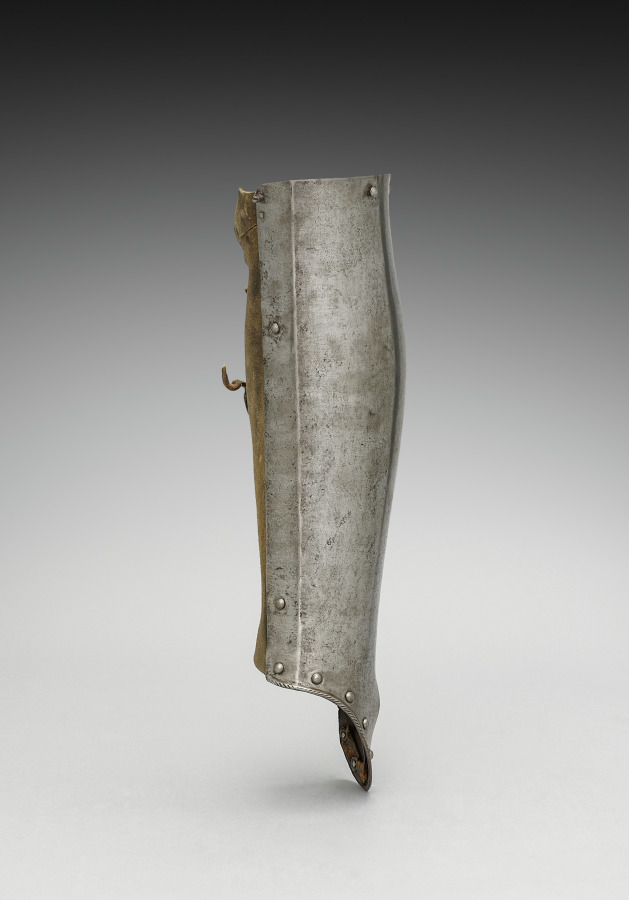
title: Left Greave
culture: Germany, 19th century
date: 1801–1900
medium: steel with black paint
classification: Arms and Armor